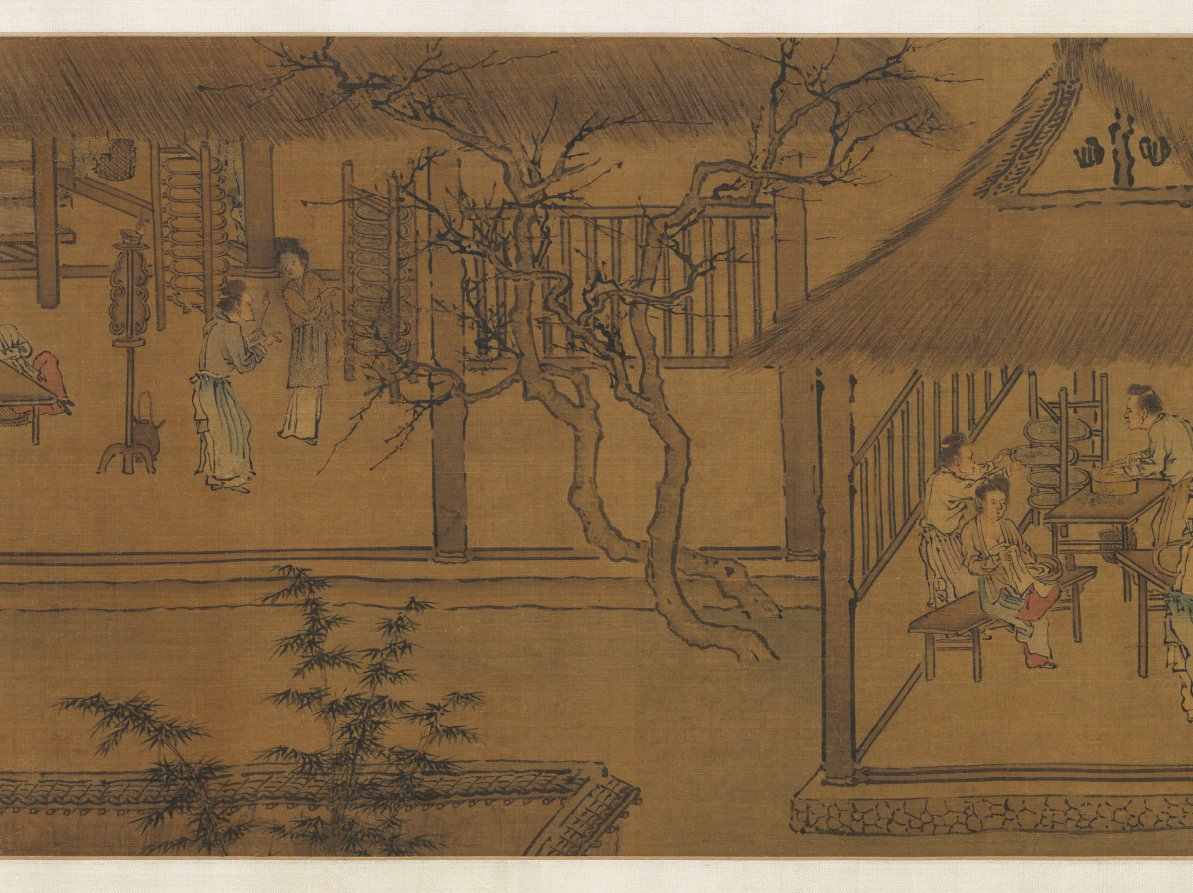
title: Sericulture (The Process of Making Silk)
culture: China, Southern Song dynasty (1127-1279)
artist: attributed to Liang Kai (Chinese, mid-1100s–early 1200s)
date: early 1200s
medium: Handscroll; ink and color on silk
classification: Painting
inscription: 3 colophons and 7 seals of Ch'eng Ch'i (20th c.).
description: By the Southern Song period, the economic center of the silk industry had shifted to the lower Yangzi delta, while the north continued to be troubled by wars. Divided into three sections, the handscroll illustrates 14 steps in the process of making silk, from the raising of silkworms to the weaving of silk cloth. The scroll’s scenes follow the illustrations of Lou Shou’s (1090–1162) Pictures of Tilling and Weaving (gengzhi tu), the first recorded painting of this genre, which was conceived in Hangzhou around 1145. However, in the Cleveland painting the artist groups several scenes of sericulture together under the roof of an open structure.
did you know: The painting is attributed to Liang Kai, a court artist active from about 1201 to 1204 at the Imperial Painting Academy in the city of Hangzhou, a major silk weaving center from that time to the present day.